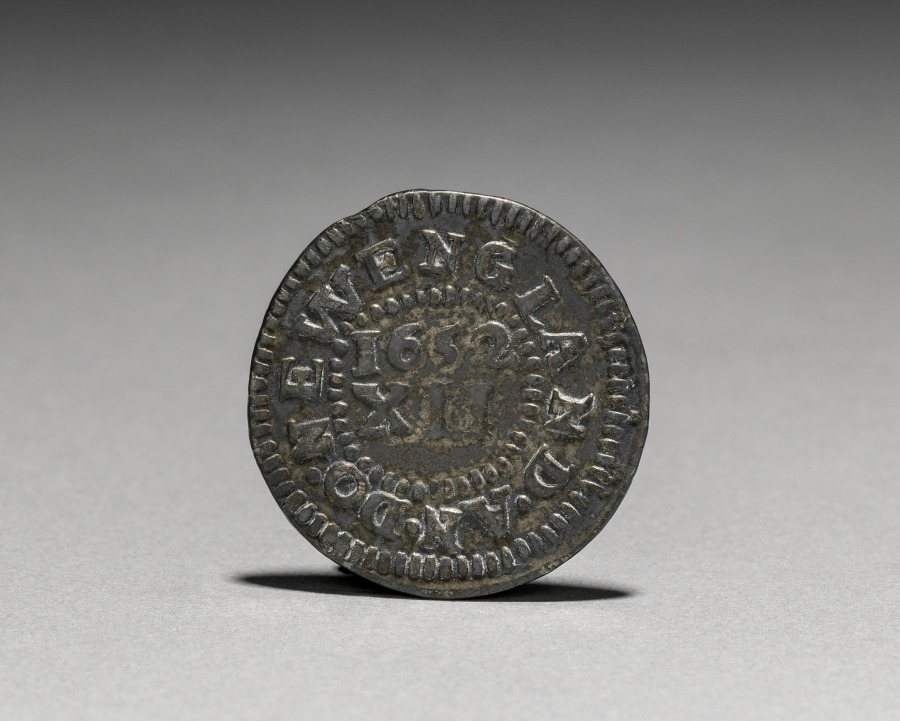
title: Pine Tree Shilling (reverse)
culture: America, Massachusetts, Boston, 17th century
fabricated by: John Hull (American, 1624–1683)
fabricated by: Robert Sanderson (American, 1609–1693)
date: 1652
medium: silver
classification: Coins